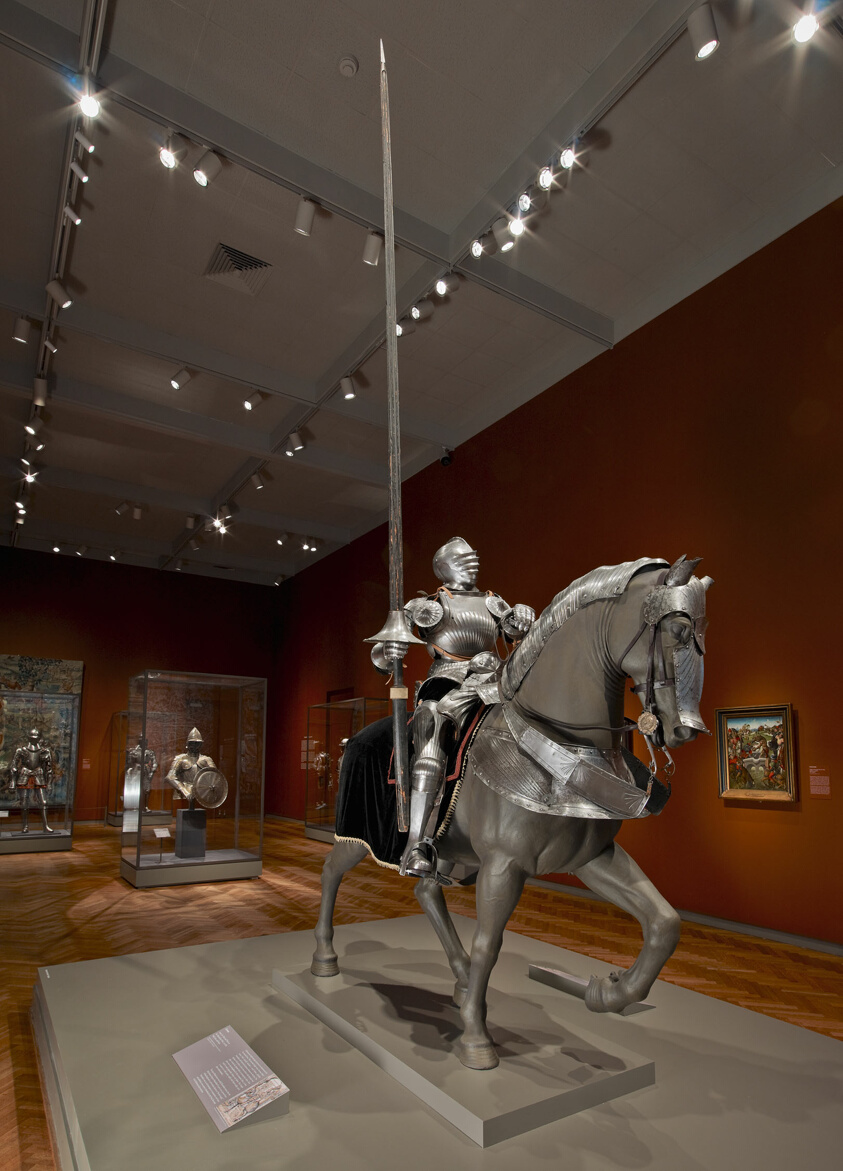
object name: Armor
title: Field Armor for Man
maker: South German, Nuremberg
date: c. 1520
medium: Steel, iron, brass, leather, and textile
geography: Nuremberg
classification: suit; armor; arms and armor